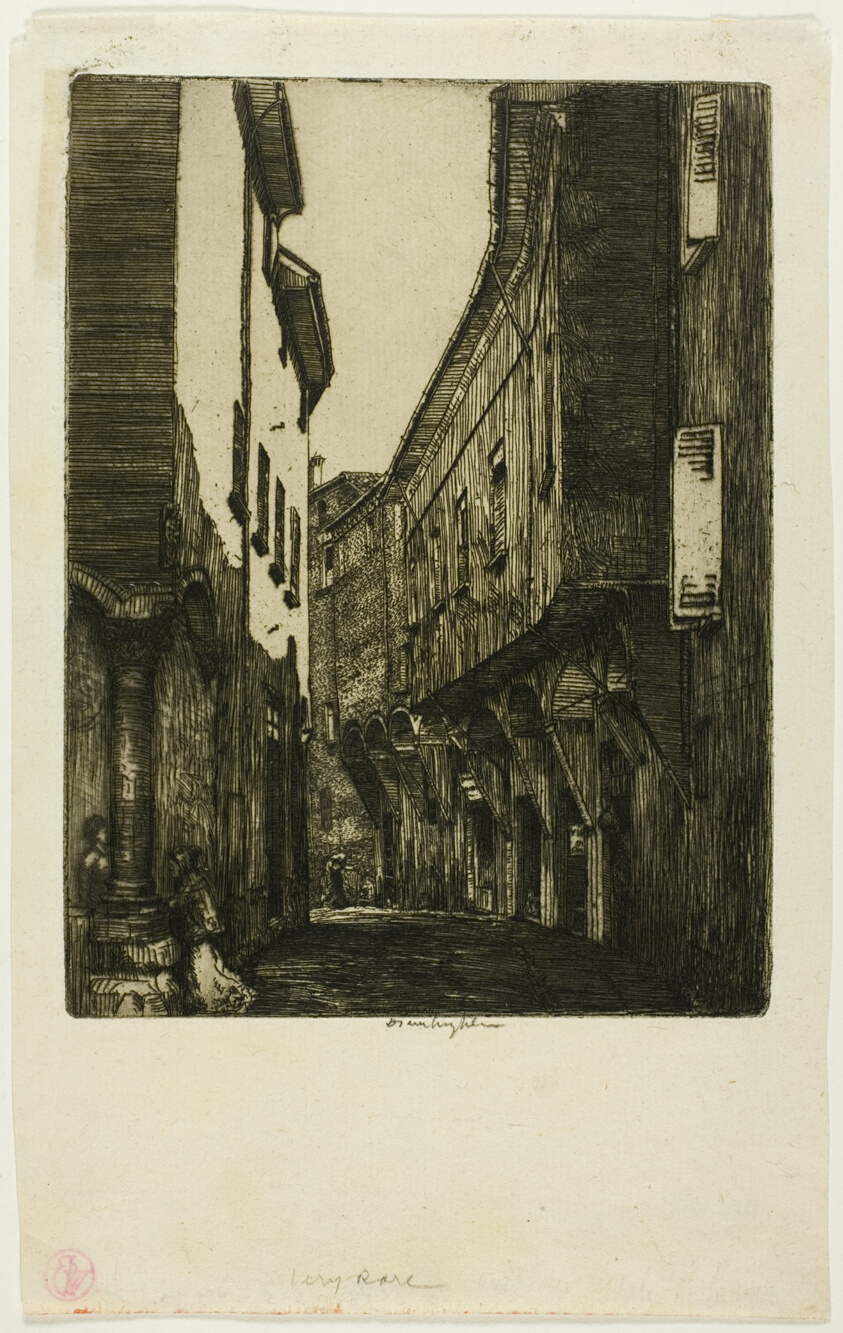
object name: Print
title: Via San Vitale, Bologna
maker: Donald Shaw MacLaughlan (American, born Canada, 1876-1938)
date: 1904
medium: Etching in black on cream laid paper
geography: United States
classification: etching; print; prints and drawing